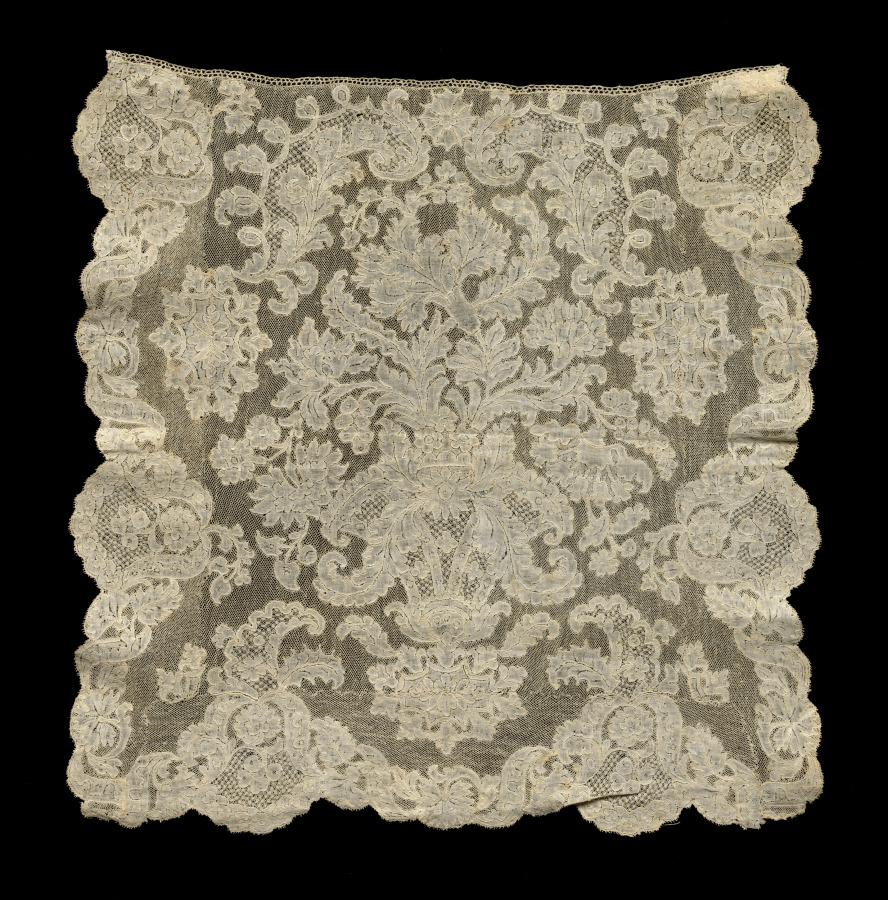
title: Lace Jabot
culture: Belgium, Mechelen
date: 1700–1720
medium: Linen: bobbin lace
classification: Lace